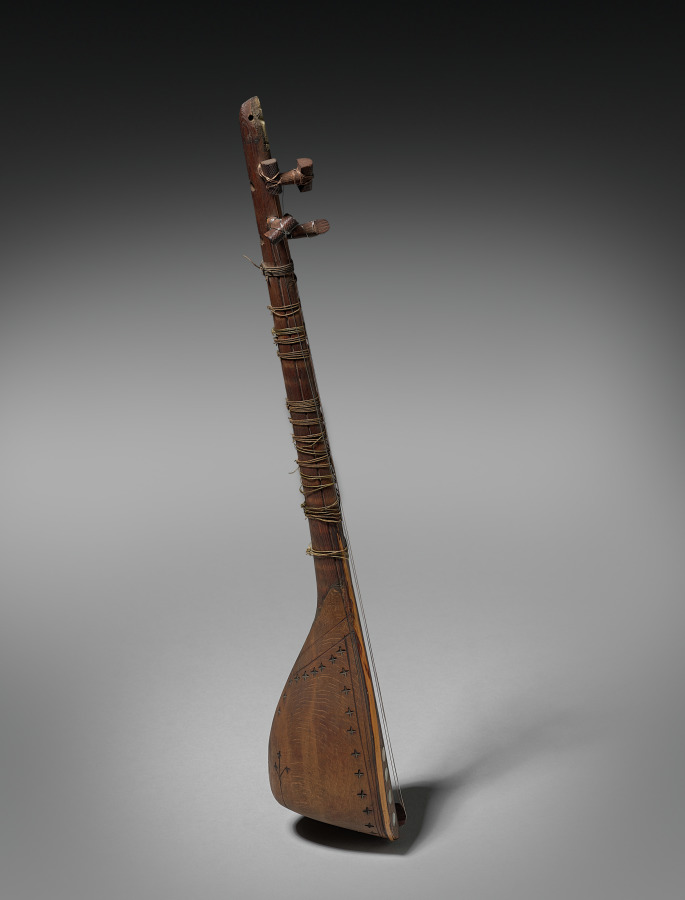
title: Tanbūr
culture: Syria or Turkey, Ottoman period (1299–1922)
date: late 1800s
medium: Wood, bone, mother-of-pearl, and wire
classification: Musical Instrument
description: This long-necked lute collected in Ottoman Syria possesses traits that are Syrian, Turkish, and Iranian and provides an example of the musical interaction between cultures. It is an ancient instrument and resembles lutes used in Pharaonic Egypt and Mesopotamia. In its many forms, the tanbūr was a common instrument throughout the Islamic world. It is often used as a solo instrument in both sacred and secular contexts. Burn marks decorate the pear-shaped body along with inlaid dots of mother-of-pearl, which may also have helped with navigation of the fret board by the player.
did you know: The two pairs of wire strings would be played with a quill plectrum.